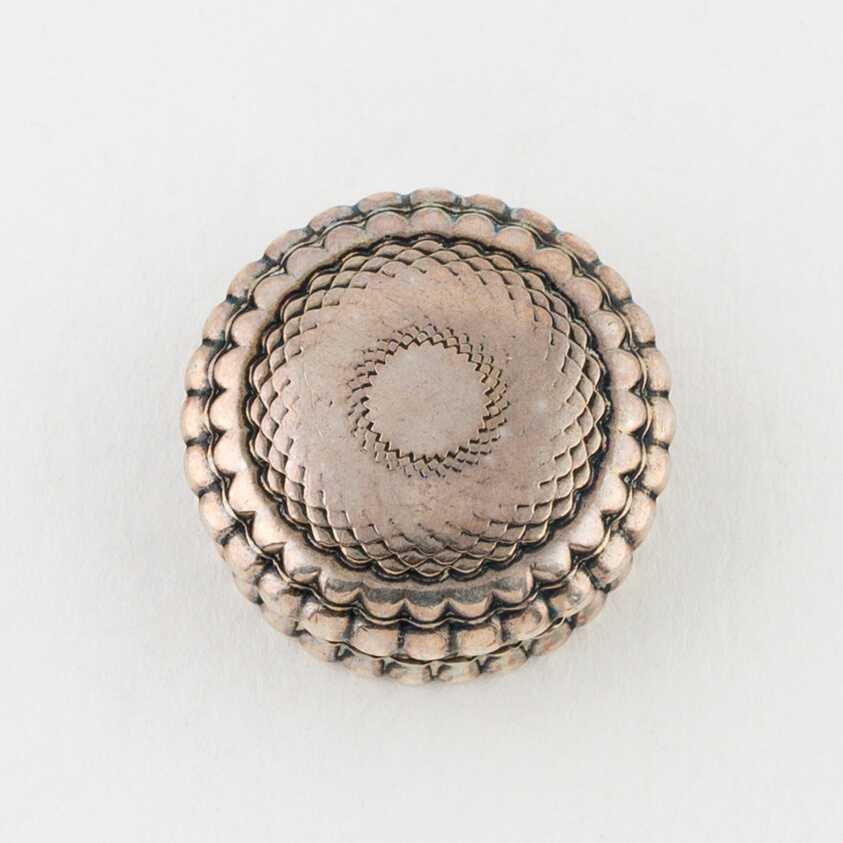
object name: Metalwork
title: Box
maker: Possibly England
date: c. 1870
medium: Silver and silver gilt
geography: England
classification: container for personal use; european decorative arts; metalwork; silver; decorative object/ornament